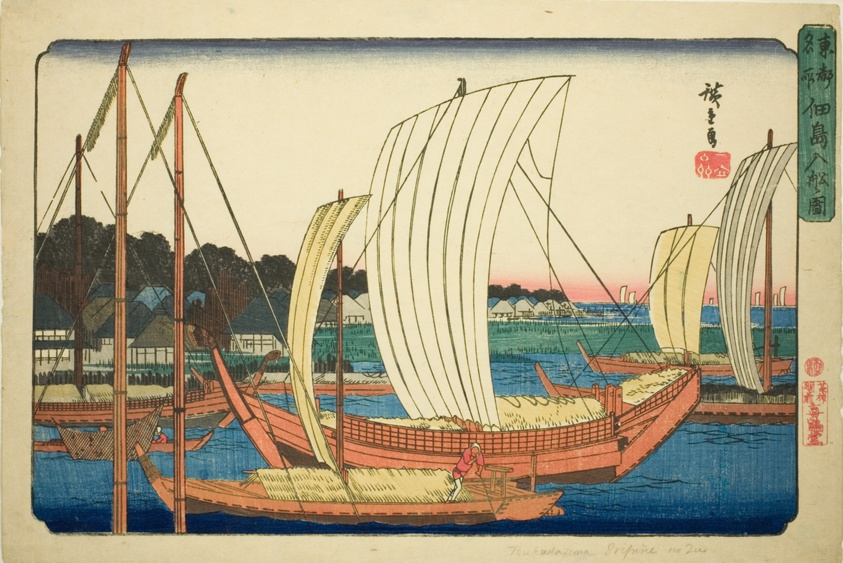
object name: Print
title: Incoming Boats at Tsukuda Island (Tsukudajima irifune no zu), from the series "Famous Places in the Eastern Capital (Toto meisho)"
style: Japanese (culture or style)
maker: Utagawa Hiroshige 歌川 広重; Japanese, 1797-1858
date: c. 1832/38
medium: Color woodblock print; oban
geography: Japan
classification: woodblock print; print; asian art